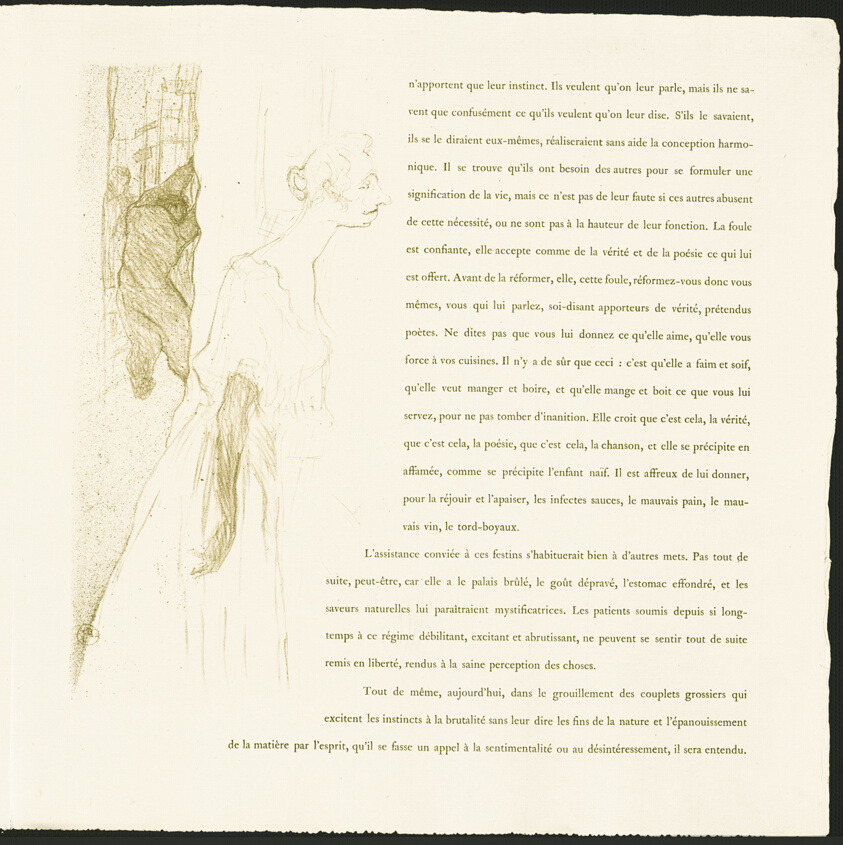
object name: Print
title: Yvette Guilbert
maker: Henri de Toulouse-Lautrec (French, 1864-1901)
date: 1894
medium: Lithograph with letterpress, on ivory laid paper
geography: France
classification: lithograph; print; prints and drawing